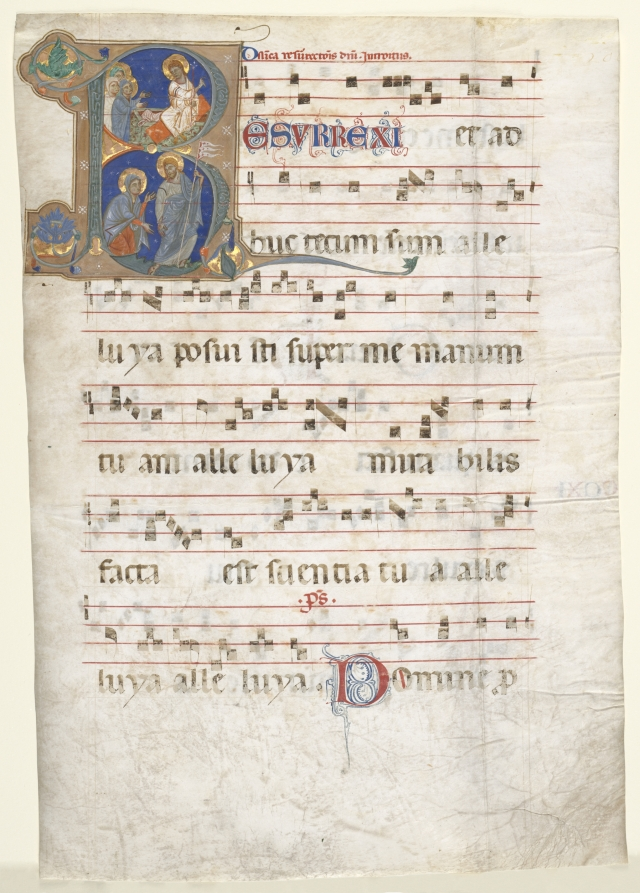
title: Leaf from a Gradual: Initial (R) with the Three Marys at the Tomb and "Noli me Tangere"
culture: Italy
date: c. 1270–1300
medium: Ink, tempera, and gold on vellum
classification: Manuscript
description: This choral leaf introduces the introit, or opening prayers, of the Easter Sunday Mass. The historiated letter R begins the text Resurrexi, et adhuc tecum sum, alleluia (I arose, and am still with you, alleluia). Within the upper register of the initial, the artist represents the three women named Mary, mentioned in the gospels, who discovered Christ’s empty tomb. In the lower register, a scene known simply as noli me tangere (touch me not), recounts the appearance of Christ to Mary Magdalene following the Resurrection. When she recognized him, he asked that she not touch him but go to the disciples with the message that he was now risen.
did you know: The name gradual derives from the practice of singing on the “gradual” steps of a raised pulpit.